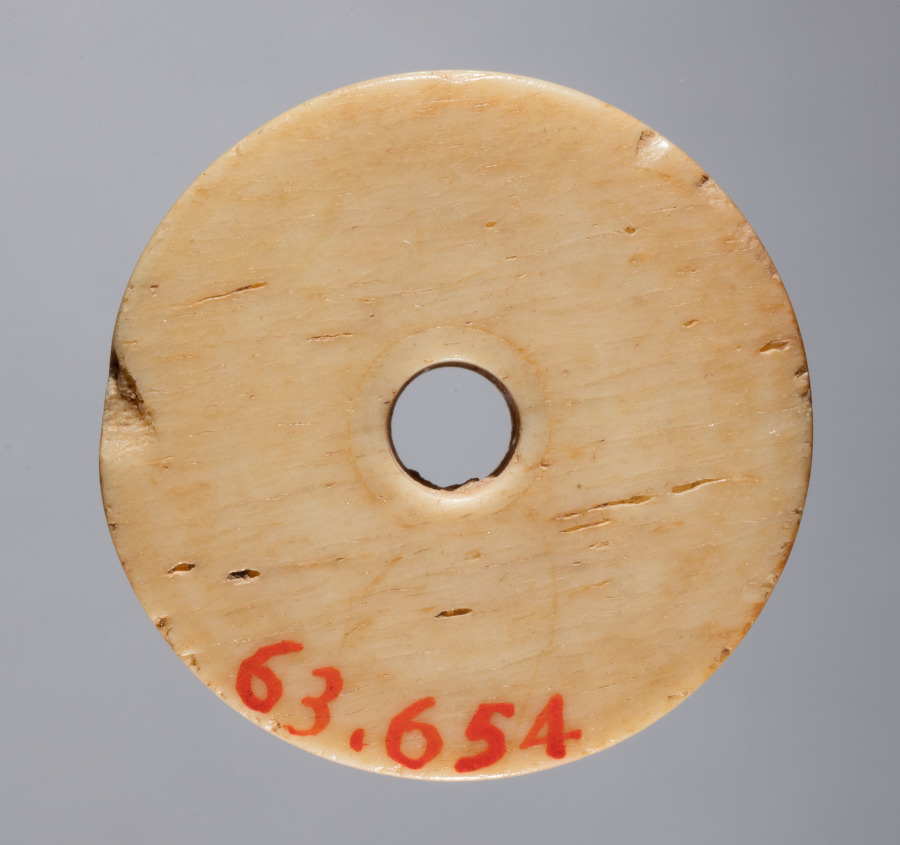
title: Spindle Whorl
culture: Iran, early Islamic period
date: 700s - 900s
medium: bone, incised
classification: Spindle Whorl